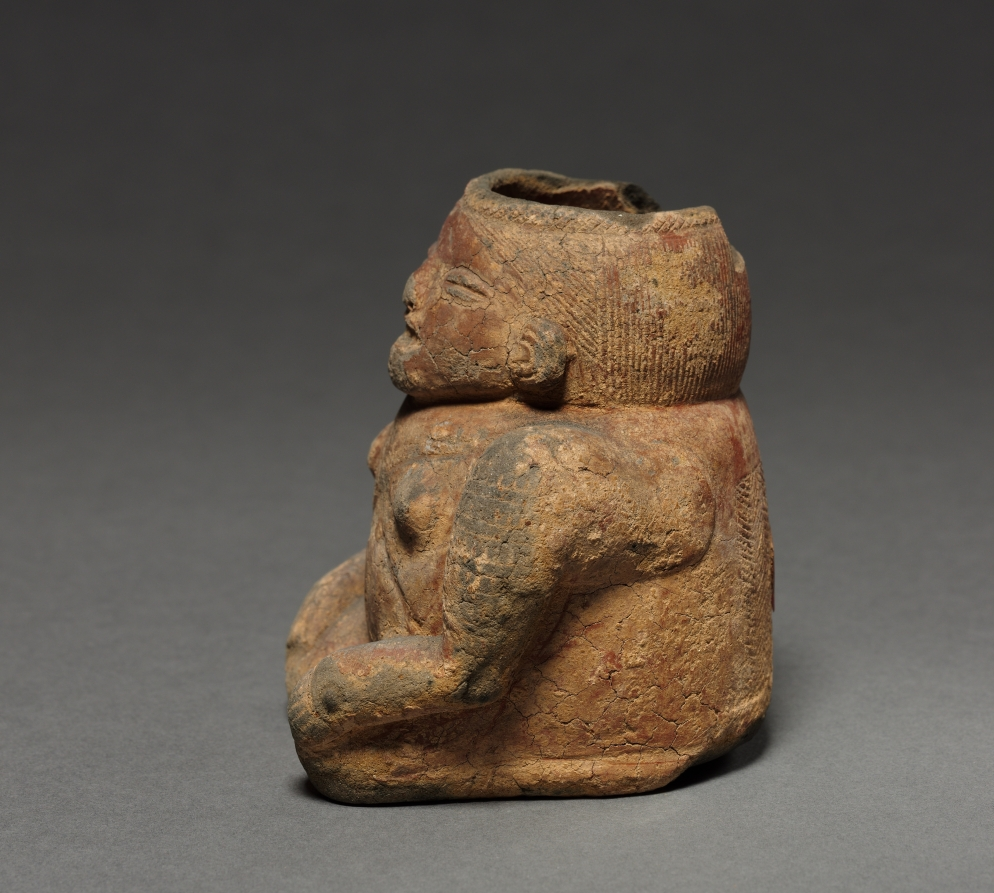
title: Figure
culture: Colombia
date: before 1550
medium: red ware with incised patterns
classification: Ceramic